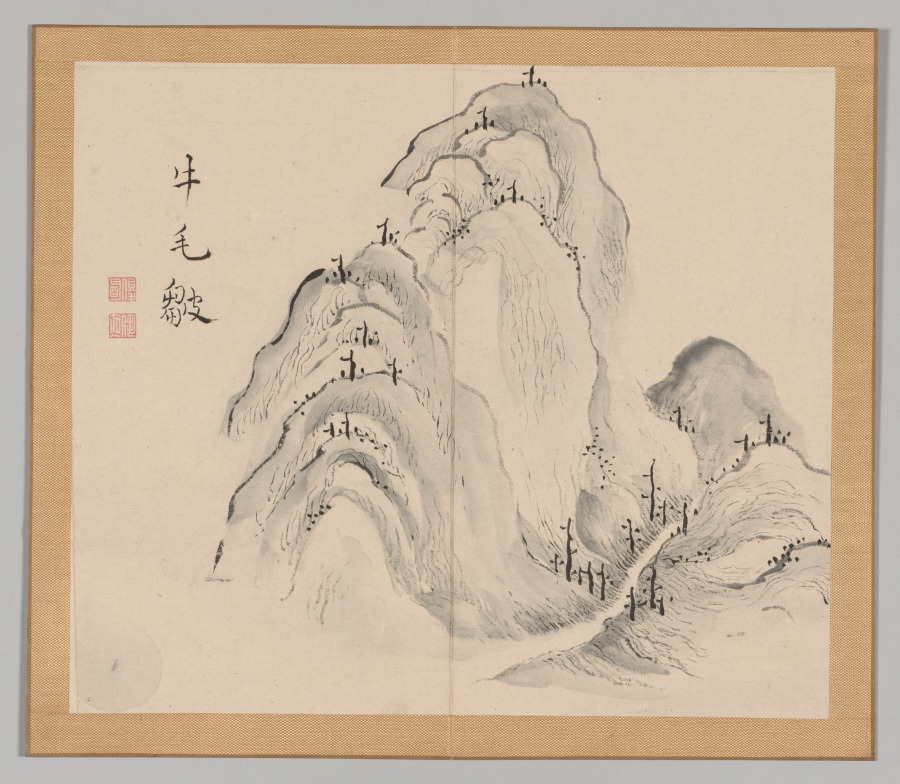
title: Reverberations of Taiga, Volume 1 (leaf 15)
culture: Japan, Edo period (1615–1868)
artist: Aoki Shukuya (Japanese, d. 1802)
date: mid- to late 1700s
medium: double-leaf from a pair of albums; ink and light color on paper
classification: Portfolio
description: Traditionally, young painters in Japan began their studies with an established master-painter. The master's compositions invariably became models that the apprentice copied to learn various ink and brush techniques. Shukuya was a pupil of the famous Kyoto artist Ikeno Taiga, whose style is reflected in these sketches of rocks, trees, and mountains.